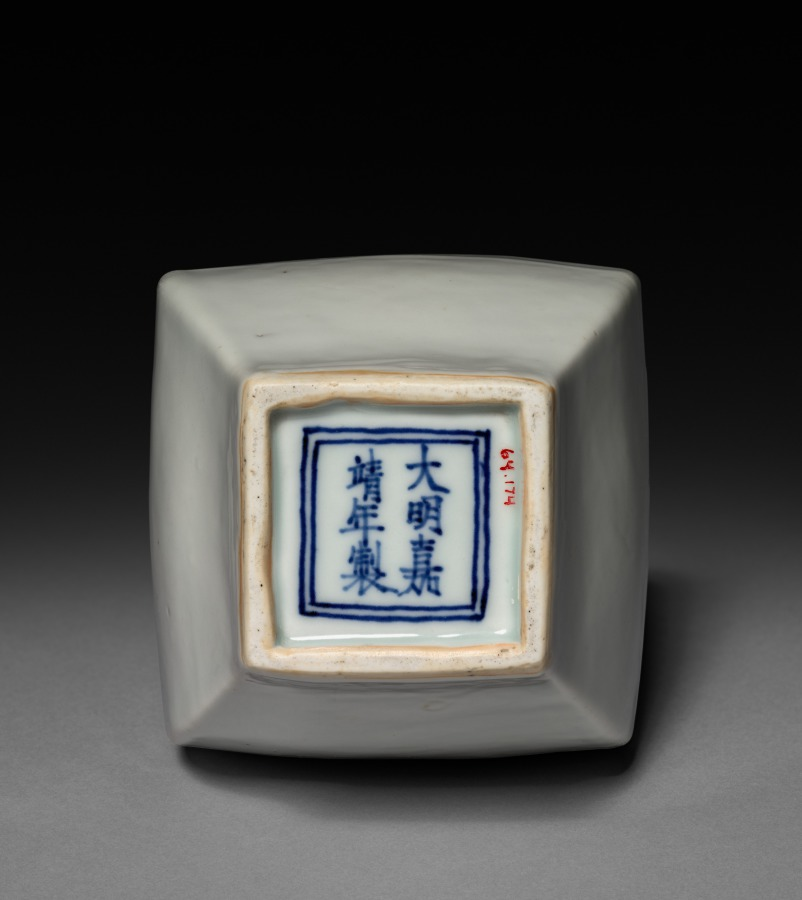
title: Square Jar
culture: China, Jiangxi province, Jingdezhen kilns, Ming dynasty (1368-1644), Jiajing mark and reign (1522-66)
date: 1522–66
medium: porcelain with white glaze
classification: Ceramic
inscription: 大明嘉靖年製